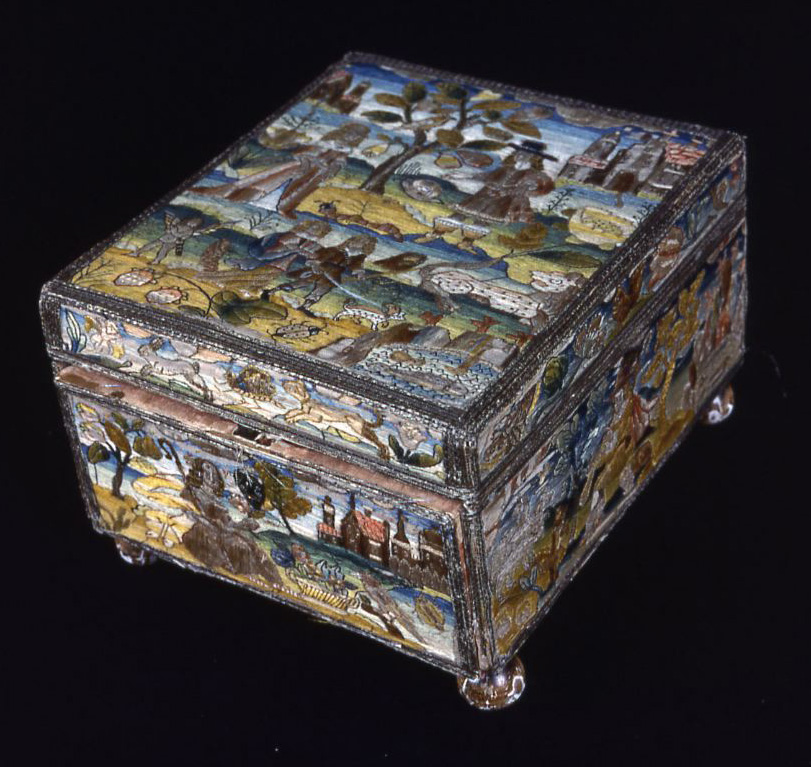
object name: Textile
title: Writing Box (Needlework)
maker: England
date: 17th century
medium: Wooden box; covered with linen, plain weave; embroidered with silk floss in back, running, and satin stitches; laid work and couching; edged with silvered-metal-strip-wrapped silk and silvered-metal strips, plain weave; lined with silk, plain weave and plain weave with supplementary pile warps forming cut solid velvet; silver hardware; two glass bottles inside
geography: England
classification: textile; needlework (visual works)